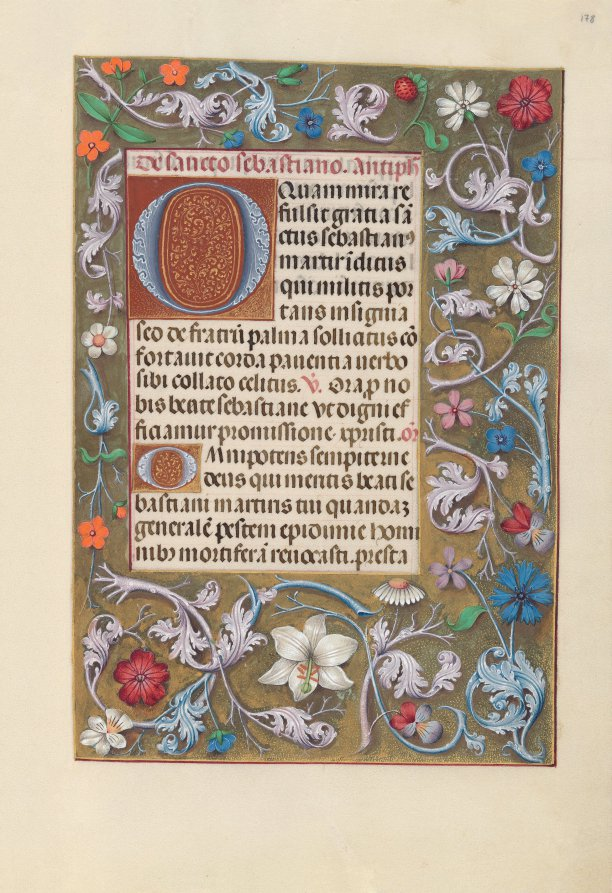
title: Hours of Queen Isabella the Catholic, Queen of Spain: Fol. 178r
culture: Flanders, Ghent and Bruges, late 15th century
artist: Master of the First Prayerbook of Maximillian (Flemish, c. 1444–1519)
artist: and Associates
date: c. 1500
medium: ink, tempera, and gold on vellum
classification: Bound Volume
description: This manuscript was illuminated by a circle of at least five highly organized manuscript painters active in the Flemish cities of Ghent and Bruges. The principal illuminator was Alexander Bening, who painted the majority of the book's miniatures. Manuscripts produced by this circle of artists are renowned for the decoration of their borders, which typically feature a rich variety of realistically-painted flowers, birds, and butterflies. This prayer book, called a book of hours, was intended not for a cleric, but for the private devotions of a lay person-in this case, Isabella the Catholic, Queen of Spain (1451-1504). Isabella's coat of arms embellishes the book's frontispiece. It is unlikely that the book was commissioned by the Queen herself; rather, she probably received it as a diplomatic gift from someone courting her patronage, perhaps Cardinal Francisco Jimenez de Cisneros. A Franciscan friar, Jimenez was dependent upon Isabella for his advancement, first to the post of Queen's confessor in 1492, and then to Archbishop of Toledo in 1495.